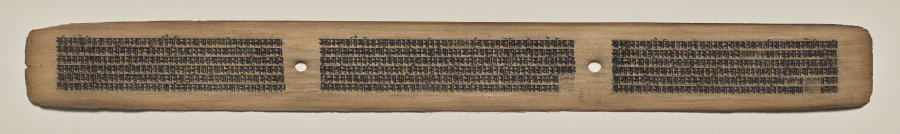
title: Text, Folio 70 (recto), from a Manuscript of the Perfection of Wisdom in Eight Thousand Lines (Ashtasahasrika Prajnaparamita-sutra)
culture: Eastern India, Bihar, Vikramashila Monastery. Painting: Nepal, Kathmandu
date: Sunday, September 14, 1119 (year 239 of the Newar Samvat in the month of Ashvina)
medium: gum tempera and ink on palm leaves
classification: Painting